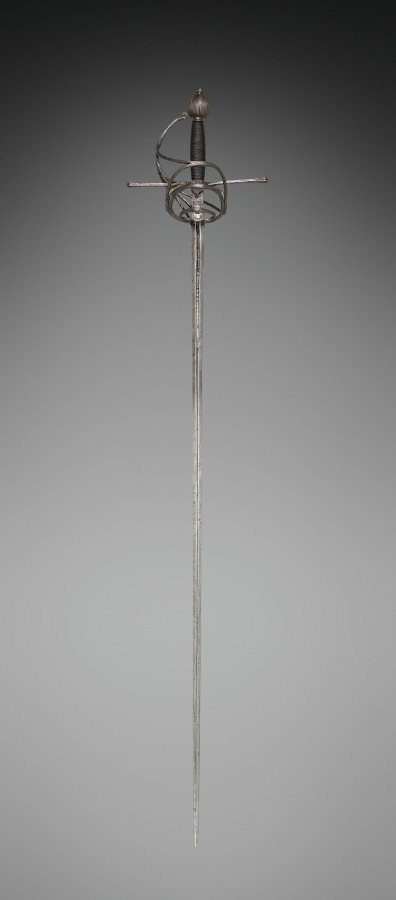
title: Rapier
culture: Blade: Spain, Toledo Hilt: Italt, Belluno?, late 16th-early 17th Century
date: c. 1580–1610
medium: steel, ribbed guard and pommel; wood and wire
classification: Arms and Armor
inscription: PIETRO HERNAN[DJEZ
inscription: three (Toledo and half-moon)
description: The rapier was a sword worn with civilian dress and used in duels. The term rapier derives from the 16th-century French word rapière, which in turn derived from the Spanish espada ropera, or “dress sword.” The rapier was a light weapon with a straight double-edged and pointed blade that, with the development of the art of fencing in the 1500s and 1600s, gradually became narrower and lighter, and thus suitable for thrusts only. With the new technique of swordplay emphasizing the point of the blade, sword guards became more complex to protect the duelist’s unarmored hand. These elaborate guards were frequently decorated by various techniques—chiseling, bluing, russeting, and damascening.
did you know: During this time fencing academies were already in existence in Milan, Venice, Verona, and Madrid, and the rules of fencing evolved with two styles dominating, the Spanish and the Italian.